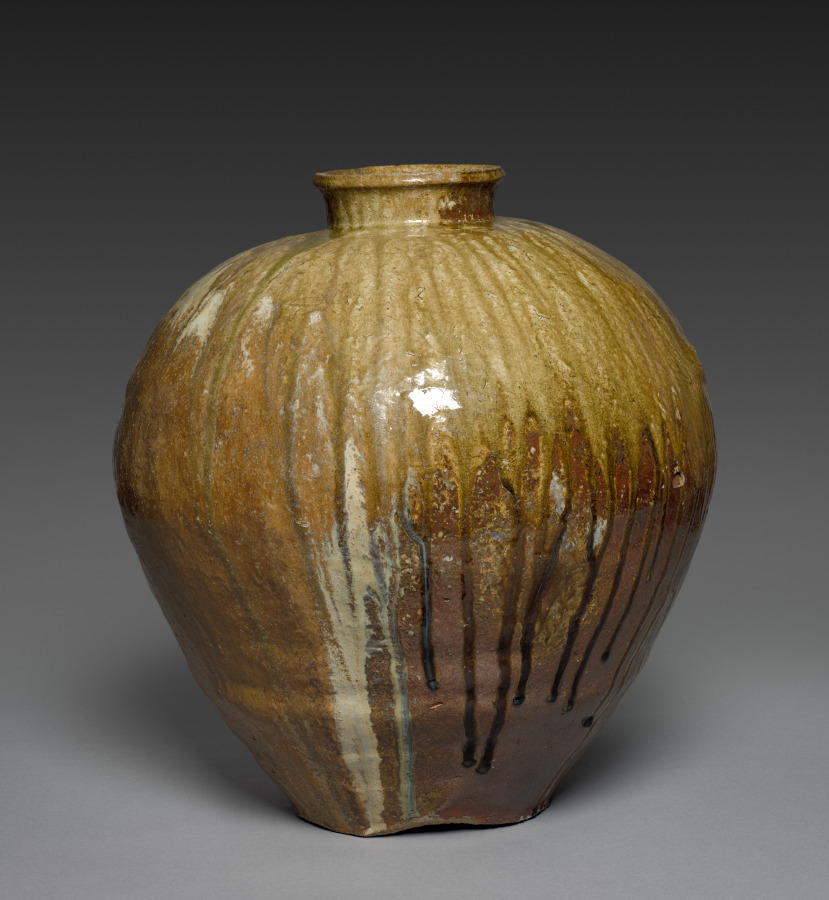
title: Storage Jar, Echizen Ware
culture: Japan, Muromachi period (1392–1573)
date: 1400s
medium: stoneware with natural ash glaze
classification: Ceramic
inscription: Incised artisan's mark